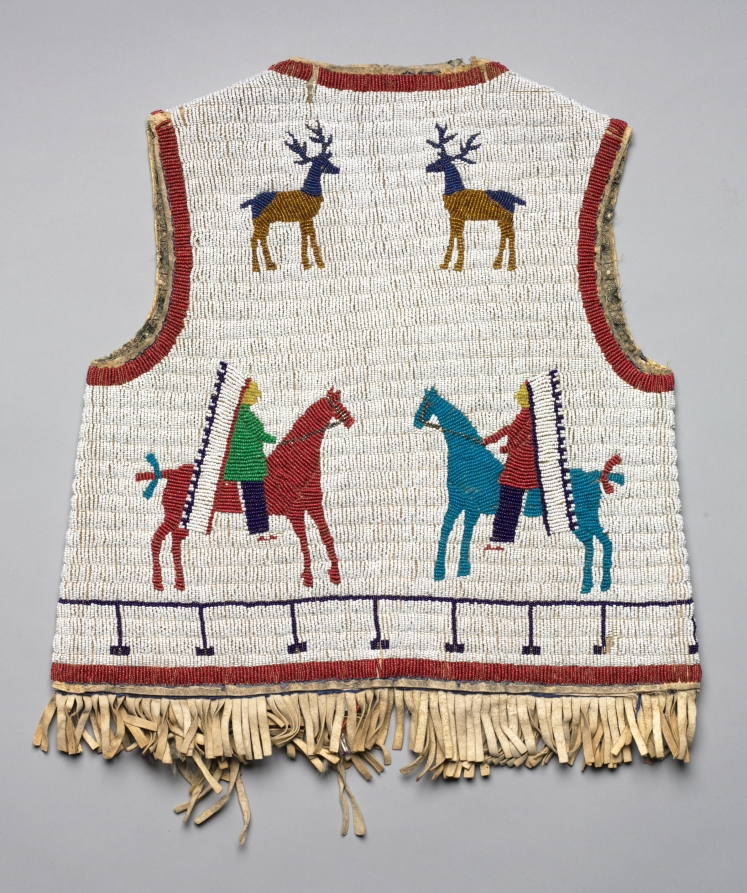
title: Beaded Child's Vest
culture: America, Native North American, Plains, Lakota(Sioux), Post-Contact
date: c 1890–1900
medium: beaded leather; cotton lining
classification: Garment